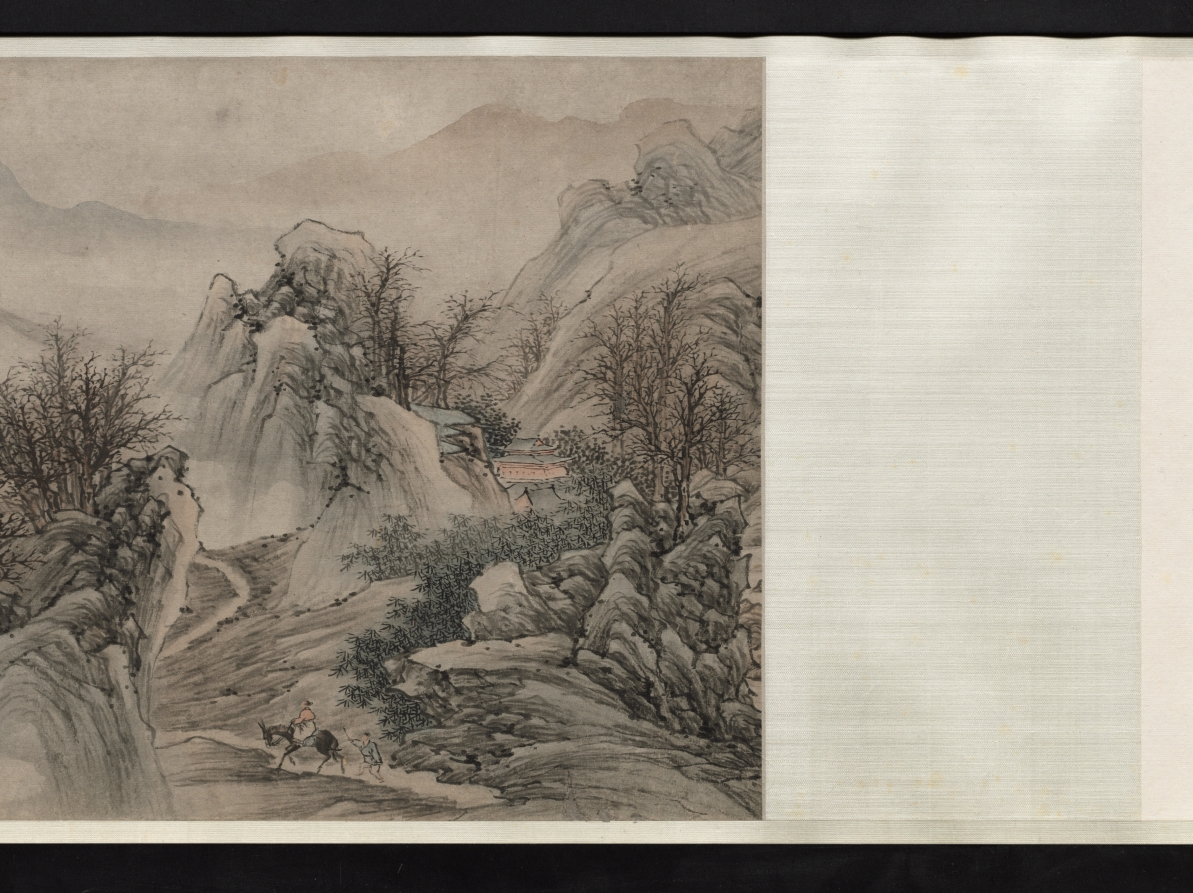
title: Autumn Mist in the Countryside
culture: China, Qing dynasty (1644-1911)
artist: Zou Zhe (Chinese, c. 1610-before 1688)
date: 1647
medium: handscroll, ink and color on paper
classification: Painting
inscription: Artist's inscription, signature, and seal: The first day of the sixth lunar month, the ting-hai year [1647], Tsou Che painted [this]. [seal] Fang-lu.